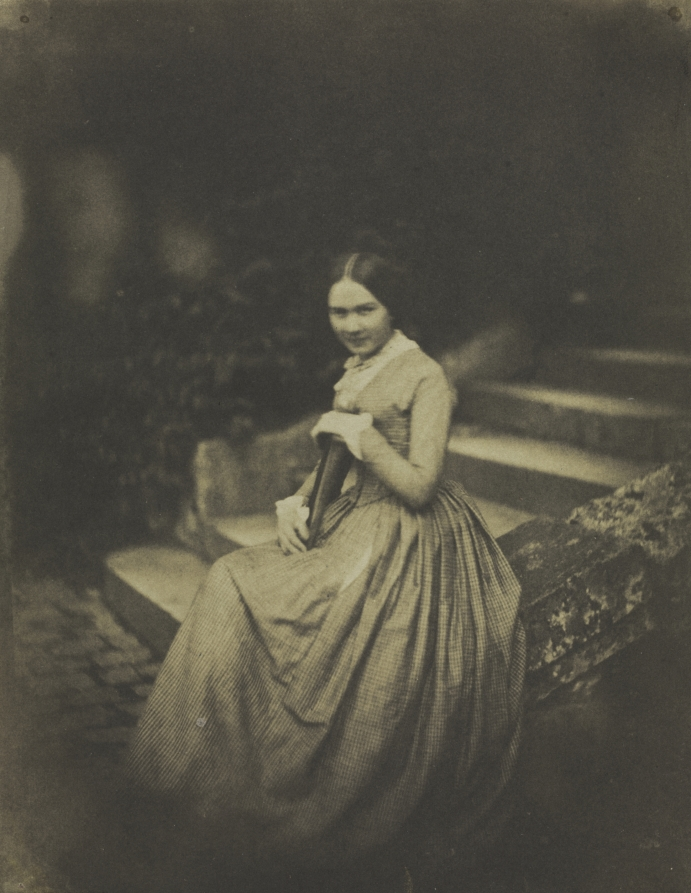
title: Henriette Robert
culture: France, 19th century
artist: Louis-Rémy Robert (French, 1811–1882)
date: 1852–1853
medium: salted paper print from waxed paper negative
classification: Photograph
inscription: written in pencil on mount: "Henriette Robert"; stamped in purple ink on verso: "Jean DIETERLE---[illegible]"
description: Henriette Robert, daughter of the distinguished amateur photographer of this portrait, is seated on a stone balustrade in the garden of the manufactory at Sèvres, where her father spent his entire professional career in various positions of authority from 1839 to 1879. Throughout his working career, however, Robert devoted much passion and energy to his interest in photography. One of his earliest themes was portraiture, embodied in a small, remarkable group of intimate views of his family and his fellow artists at Sèvres. In this spare composition, Robert posed his daughter in a contemplative manner, holding a book and deliberately looking into the camera's lens. This beautiful portrait of Henriette is distinquished by its intensity and its allusion to her personality.